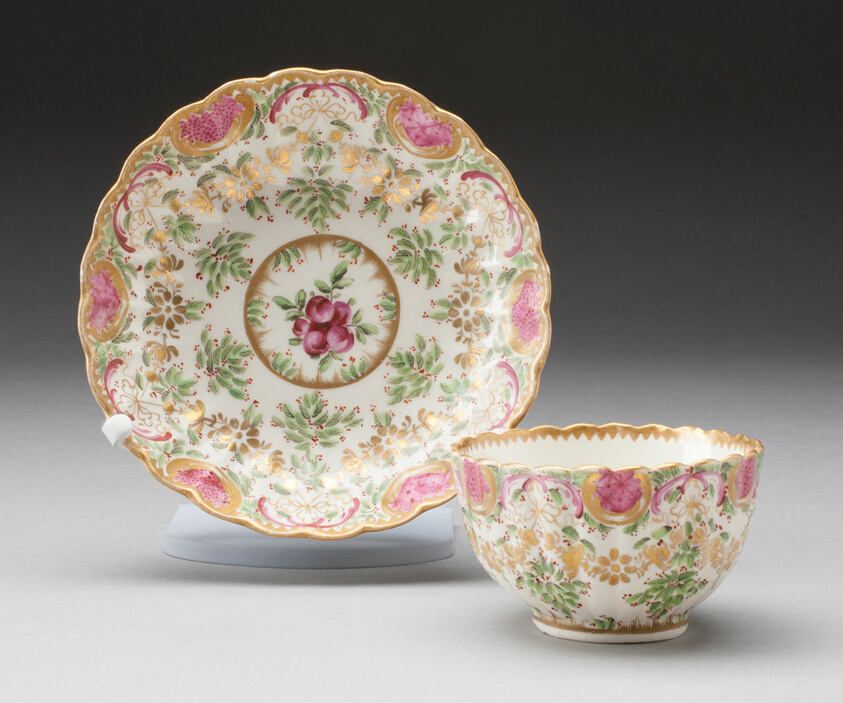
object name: Ceramics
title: Tea Bowl and Saucer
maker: Worcester Porcelain Factory (Warmstry House Period, 1751–1783); Worcester, England, founded 1751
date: c. 1775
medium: Soft-paste porcelain with polychrome enamels and gilding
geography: Worcester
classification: drinking vessel; teaware; ceramics; porcelain; european decorative arts